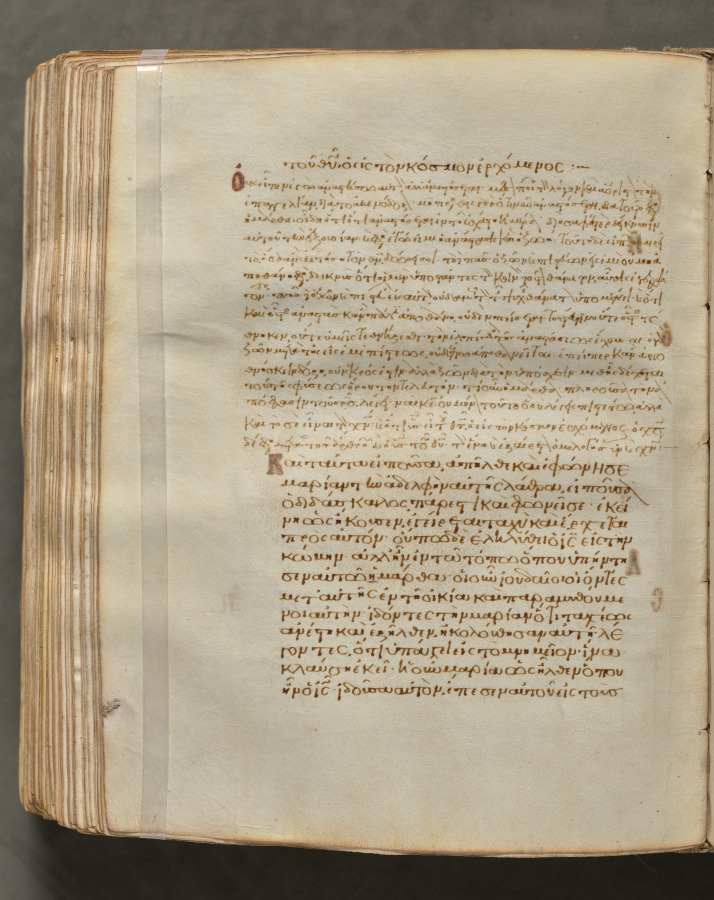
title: Text, folio 378 (verso), from a Gospel Book with Commentaries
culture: Byzantium, Constantinople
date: c. 1000–1100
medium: ink, tempera, and gold on vellum; leather binding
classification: Bound Volume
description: Each of the four gospels in this book opens on a page with brilliantly illuminated borders depicting the author of the text as well as birds—principally peacocks, symbols of the immortality of the soul—and fountains, representing the fountain of life and the salvation of the soul. This volume consists of 428 leaves with texts in Greek. Its level of sophistication suggests that it was probably written and decorated in a monastery in Constantinople.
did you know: Gospel books were carried in procession through Byzantine churches.